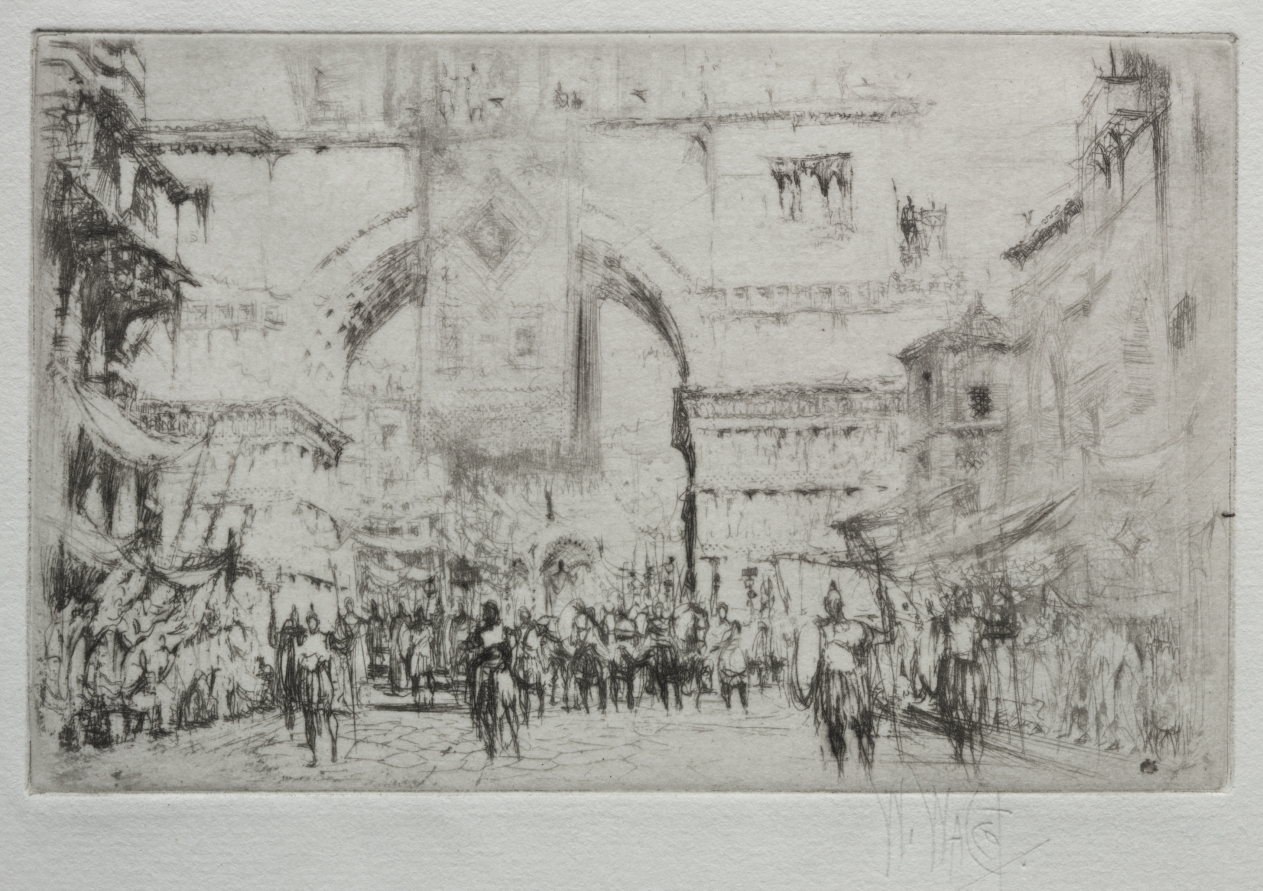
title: Hadrian Entering Salonica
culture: England, 20th century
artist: William Walcot (British, 1874–1943)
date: 1918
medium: etching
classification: Print